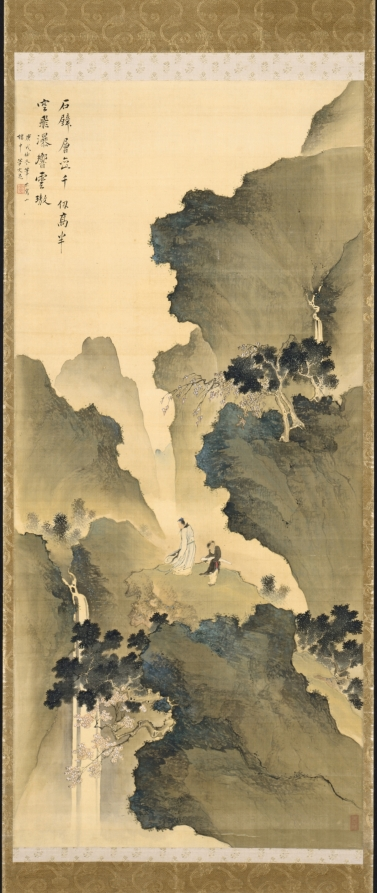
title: Gazing at a Waterfall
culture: Japan, Edo period (1615–1868)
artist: Tani Bunchō (Japanese, 1763–1841)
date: 1790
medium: hanging scroll; ink and color on silk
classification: Painting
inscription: The stone cliff of layered rocks is extremely high. Waterfalls tumbling from the skies reverberate in the clouds.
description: Artist Tani Bunchō painted this image in a mountain pavilion during winter. He inscribed it with two lines of a poem: “The stone cliff of layered rocks is extremely high. Waterfalls tumbling from the skies reverberate in the clouds.” The scholarly figure and attendant carrying his qin (a stringed instrument) are set amid majestically soaring mountains in China. For many people in Japan at the time, the image would call to mind a poem about a waterfall at Mount Lu by Chinese poet Li Bai (701–762).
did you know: Drive about eight hours west of Shanghai to get to Mount Lu, the mountain range likely alluded to in this painting.